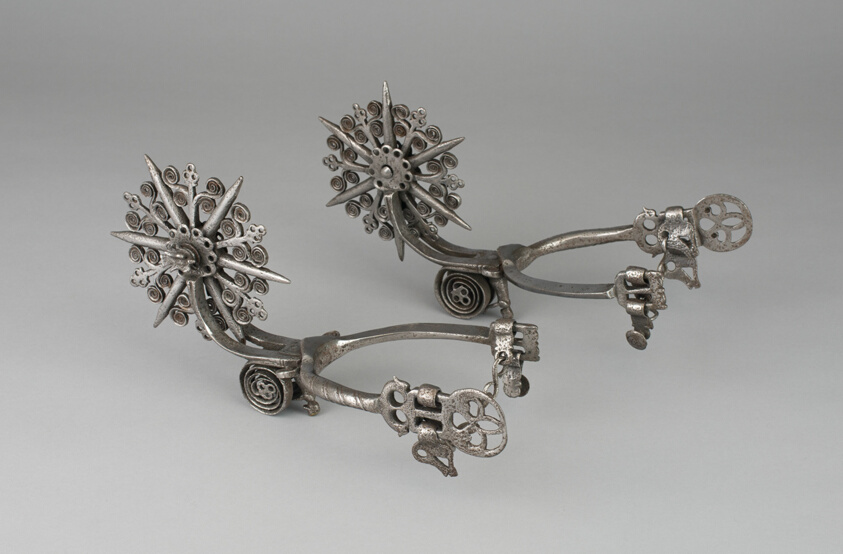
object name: Armor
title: Pair of Rowel Spurs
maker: Mexican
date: 18th/19th century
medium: Iron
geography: Mexico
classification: horse equipment; armor; arms and armor